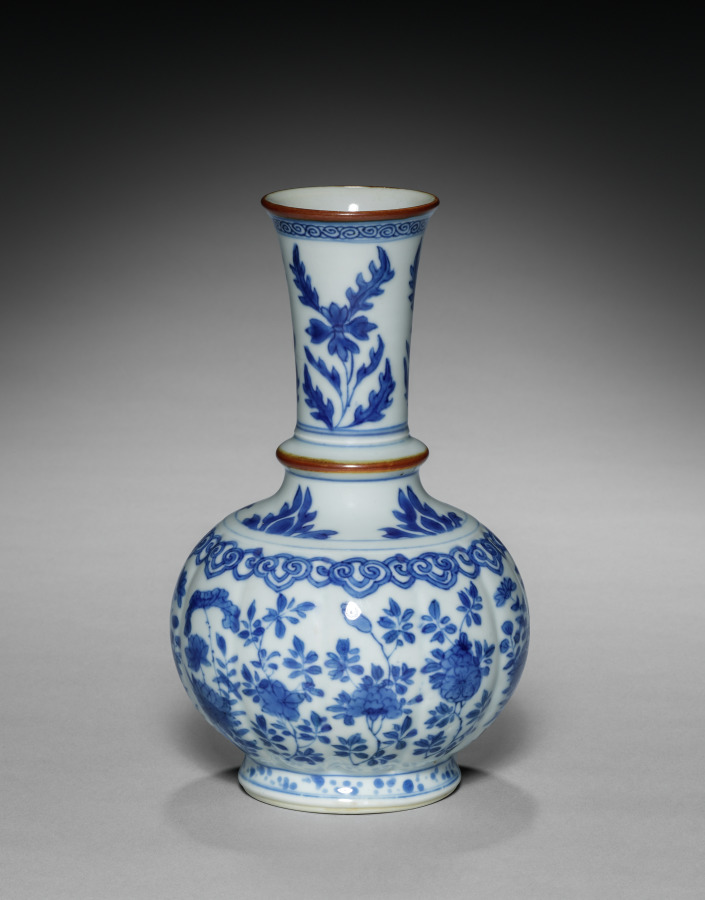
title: Lobed vase with underglaze cobalt blue decoration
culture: China, Jiangxi province, Jingdezhen kilns, Qing dynasty (1644-1911), Kangxi reign (1661-1722)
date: 1661–1722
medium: Porcelain with underglaze cobalt blue decoration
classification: Ceramic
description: Underglaze blue-and-white designs reached their highest painterly quality during the reign of the Kangxi emperor (1662–1722). Porcelain decorators achieved a level of artistic and technical sophistication that rivaled that of professional painters. Blue-and-white porcelains in brilliant cobalt blue catered to the taste of the educated class, the court, and foreign markets. Notice the blue-and-white porcelains in Pierre Bonnard’s painting Fruit and Fruit Dishes (CMA 2020.100); such ceramics on a French dining table would have been inspired by Chinese porcelains of this type.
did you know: The underside shows the mark of a feather, done in blue underglaze.